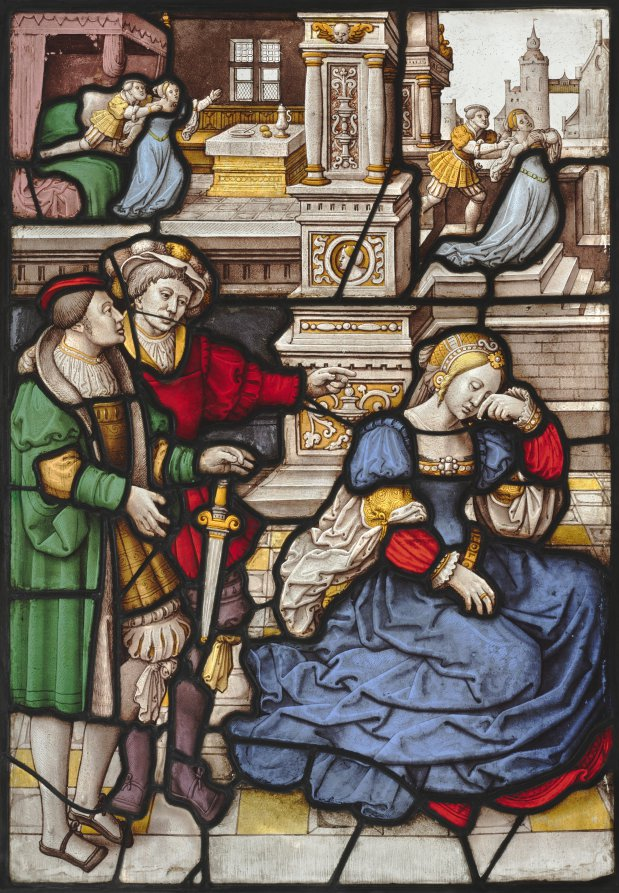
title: The Story of Lucretia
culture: Netherlands, Nijmegen, 16th century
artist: circle of Master of the "Kanis Triptych" (Netherlandish)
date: c. 1530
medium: pot-metal and white glass, silver stain and sanguine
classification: Glass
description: The tribulations of the Roman noblewoman Lucretia, a well-known story from classical antiquity, is represented here in a northern setting. Assaulted in the background by Tarquinius, she is sorrowful in the foreground. At her side are her two brothers who will seek revenge. The style is closely related to panel paintings by a distinct yet anonymous master whose best-known work is the triptych commissioned around 1526 by Jacob Kanis of Nijmegen and now housed in the museum Commanderie van Sint Jan of that city.